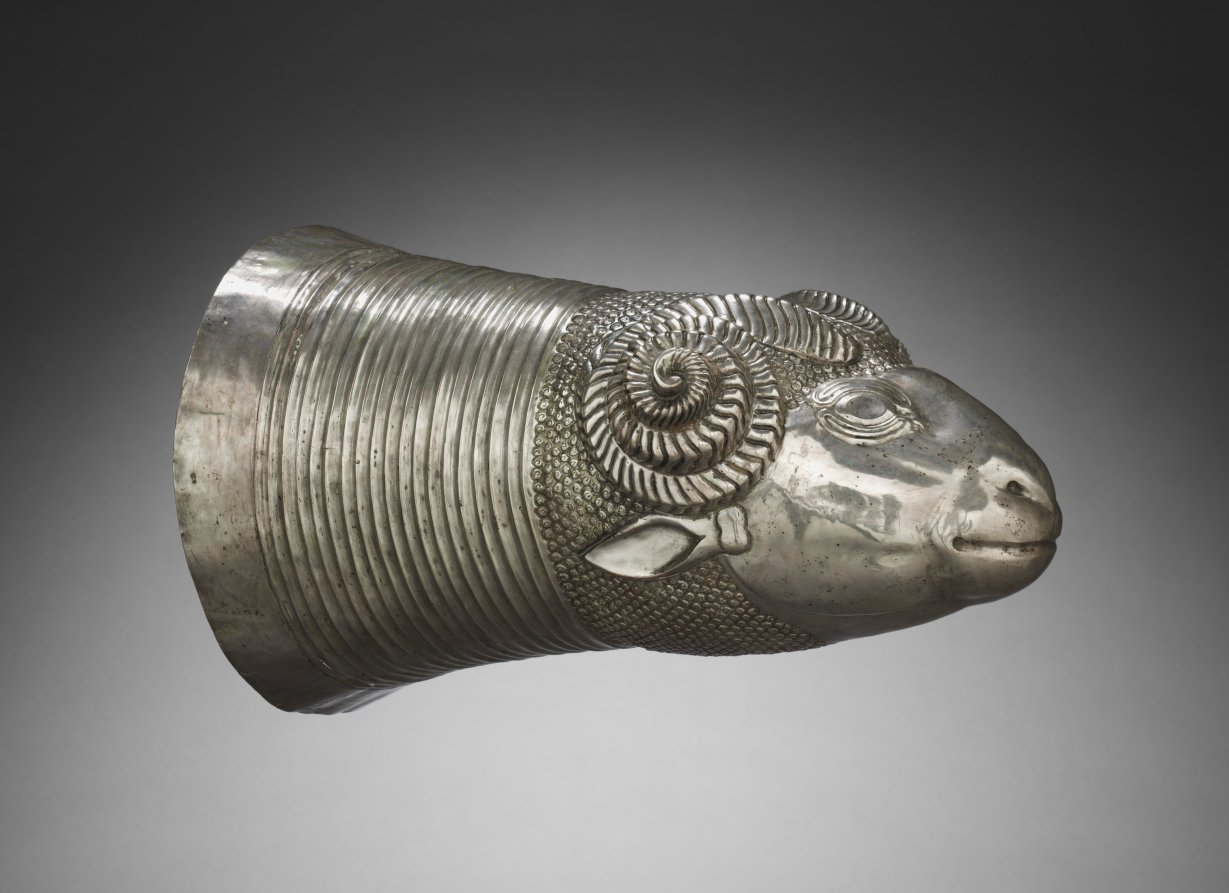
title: Ram-Head Drinking Vessel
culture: Iran, Median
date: c. 600 BCE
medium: silver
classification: Metalwork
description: The Medes, who conquered the Assyrians, were soon conquered by the Achaemenian Cyrus the Great, king of Persia from 559 to 529 BC. The rhyton, or horn-shaped drinking vessel, popular among the Medes, was adopted by the Achaemenians.